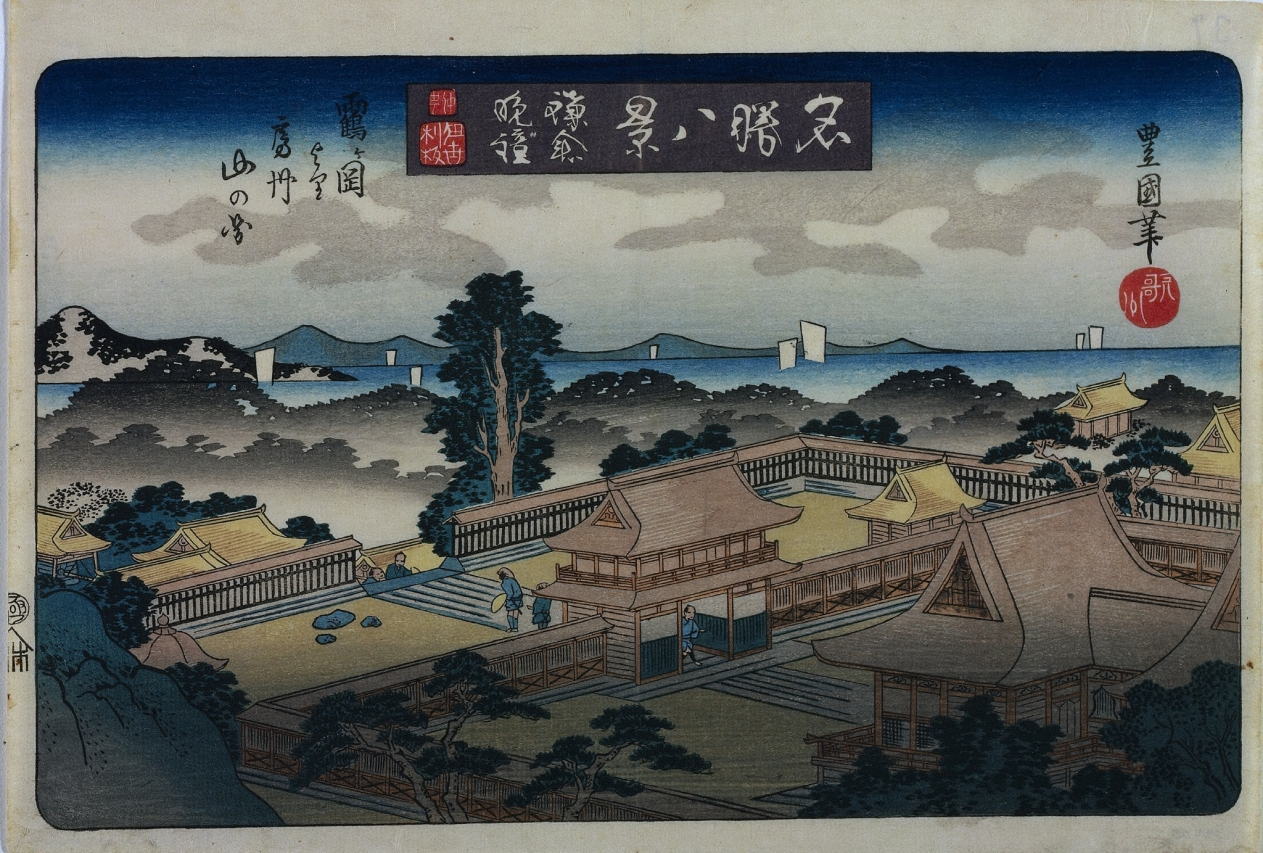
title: Eight Views of Famous Places: Evening Bell in Kamakura: The Mountains in Awa Province from the Hachiman Shrine in Tsurugaoka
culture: Japan, Edo period (1615–1868)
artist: Utagawa Toyokuni II (Japanese, 1777–1835)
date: early 1830s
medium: color woodblock print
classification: Print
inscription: Signature: Toyokuni hitsu. Artist Seal: Utagawa. Publisher: Iseya Rihei (Iseri han, Nakacho, emblem). Censorship Seal: kiwame.